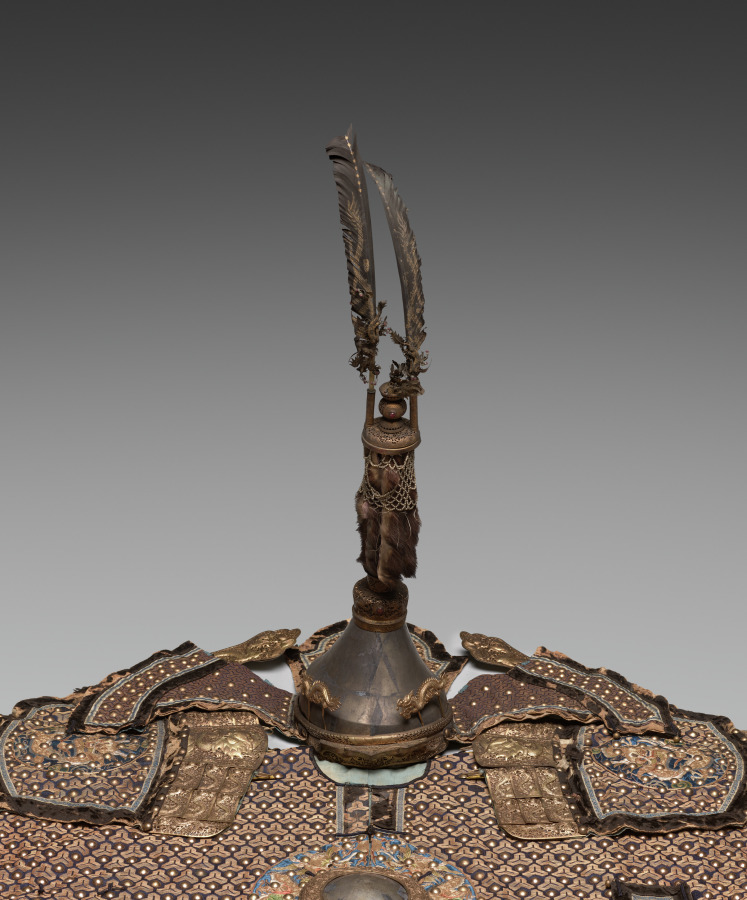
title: Ceremonial Uniform: Helmet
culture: China, Qing dynasty (1644–1911)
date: 1644–1911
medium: Satin weave silk with gold metal thread embroidery; supplementary weft; black velvet; metal (brass?); lined in blue silk; feather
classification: Arms and Armor